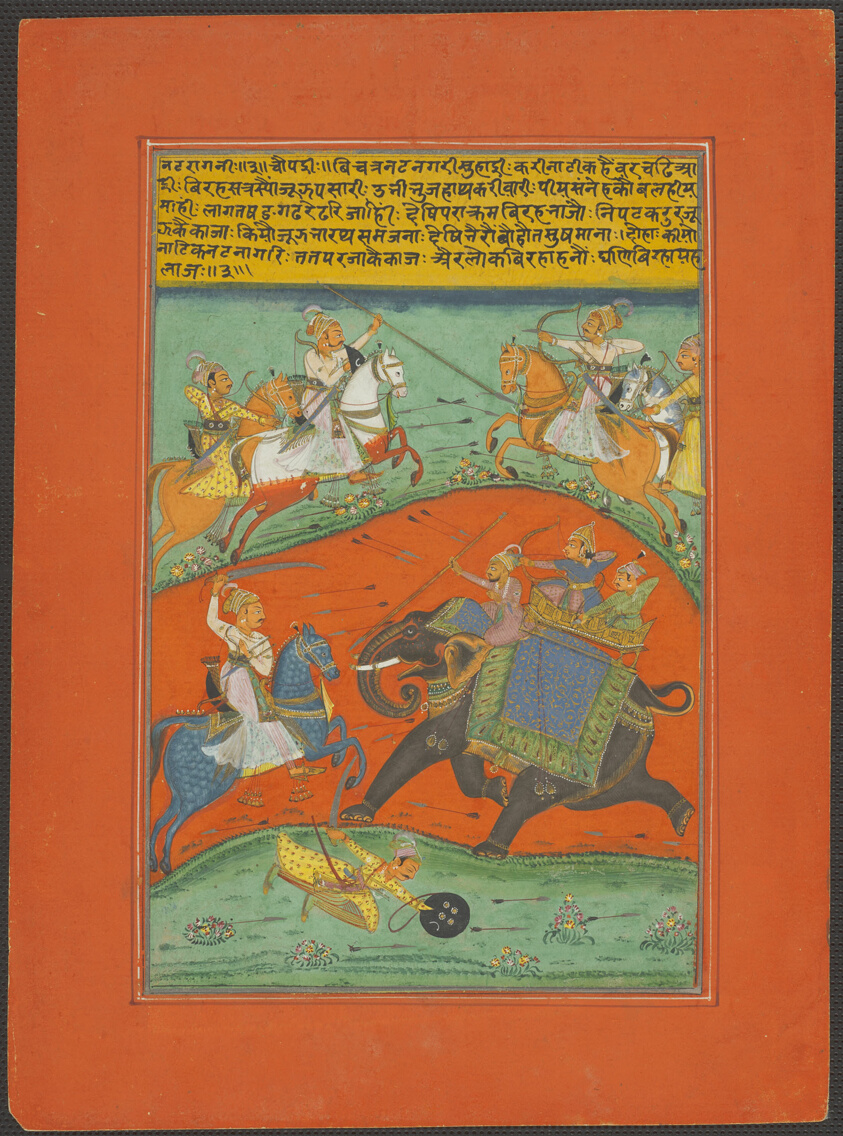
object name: Painting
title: Nat Ragini, Page from a Jaipur Ragamala Set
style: South Asian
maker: India; Rajasthan, Jaipur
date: c. 1750-1770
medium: Opaque watercolor and gold on paper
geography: Rajasthan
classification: miniature painting; painting; asian art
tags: music, musicians